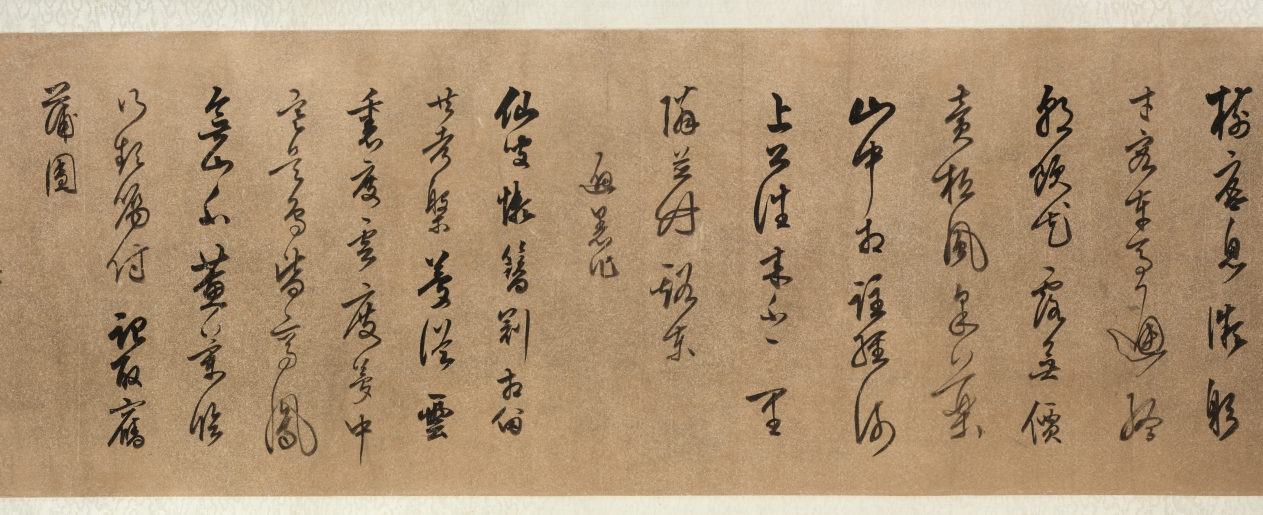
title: Four Poems: Calligraphy in Cursive Script (xingshu)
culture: China, Ming dynasty (1368–1644)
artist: Chen Jiru (Chinese, 1558–1639)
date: 1500s-1600s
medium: handscroll; ink on gold speckled paper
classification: Calligraphy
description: Written in graceful calligraphy with well-composed characters, the artist communicates his thoughts and state of mind in four poems. Characters written in dark, thick strokes convey rhythm, and indicate the moment after the writer had paused to recharge his brush with ink. Chen Jiru was a native of Huating (modern Shanghai). His calligraphy style resembles that of his friend, influential calligrapher Dong Qichang (1555–1636). Unlike Dong, Chen did not pursue government service: he burned his Confucian robes, declined a summons to serve at court, and immersed himself in literature, calligraphy, and painting.